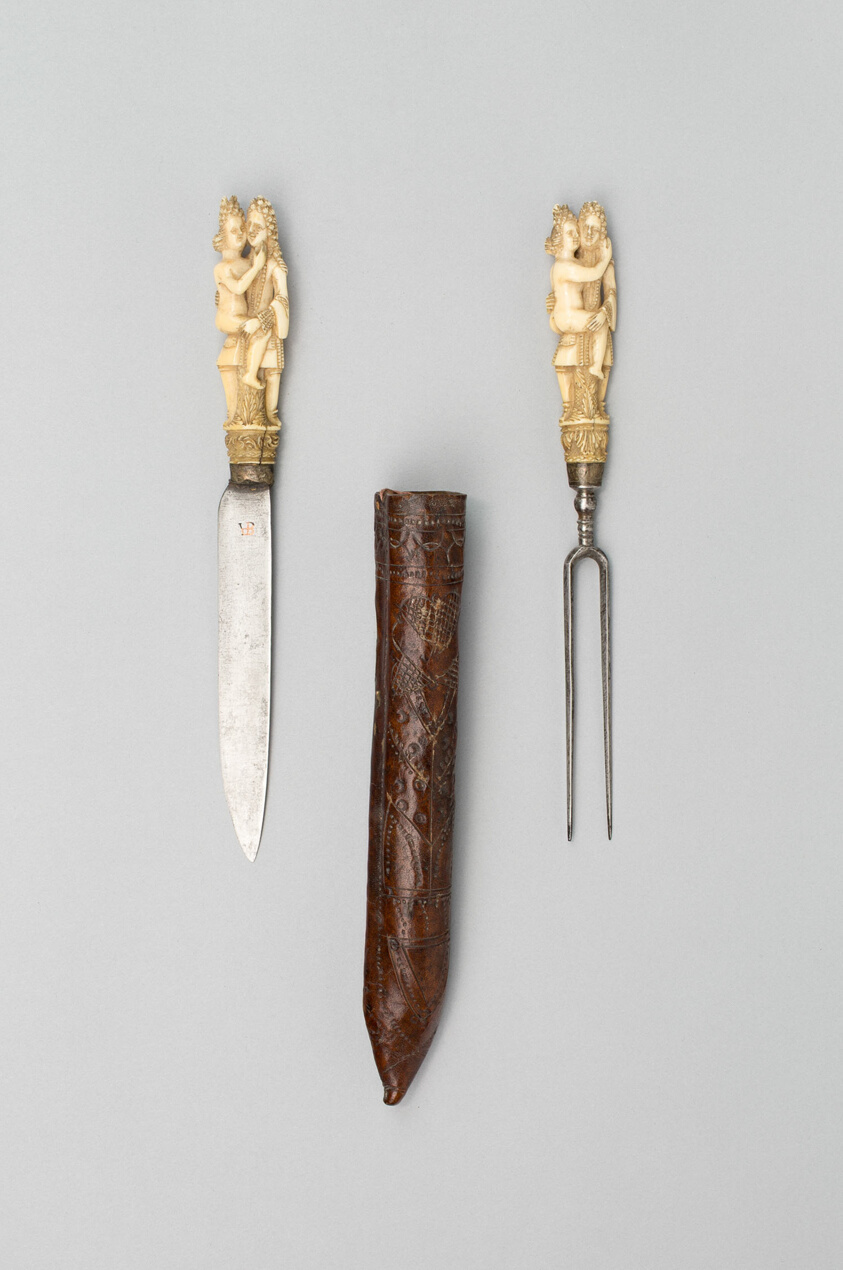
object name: Metalwork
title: Knife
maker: European, possibly Dutch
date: late 17th century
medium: Steel, copper, and ivory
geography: Europe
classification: cutlery; arms and armor, miscellaneous; arms and armor; arms